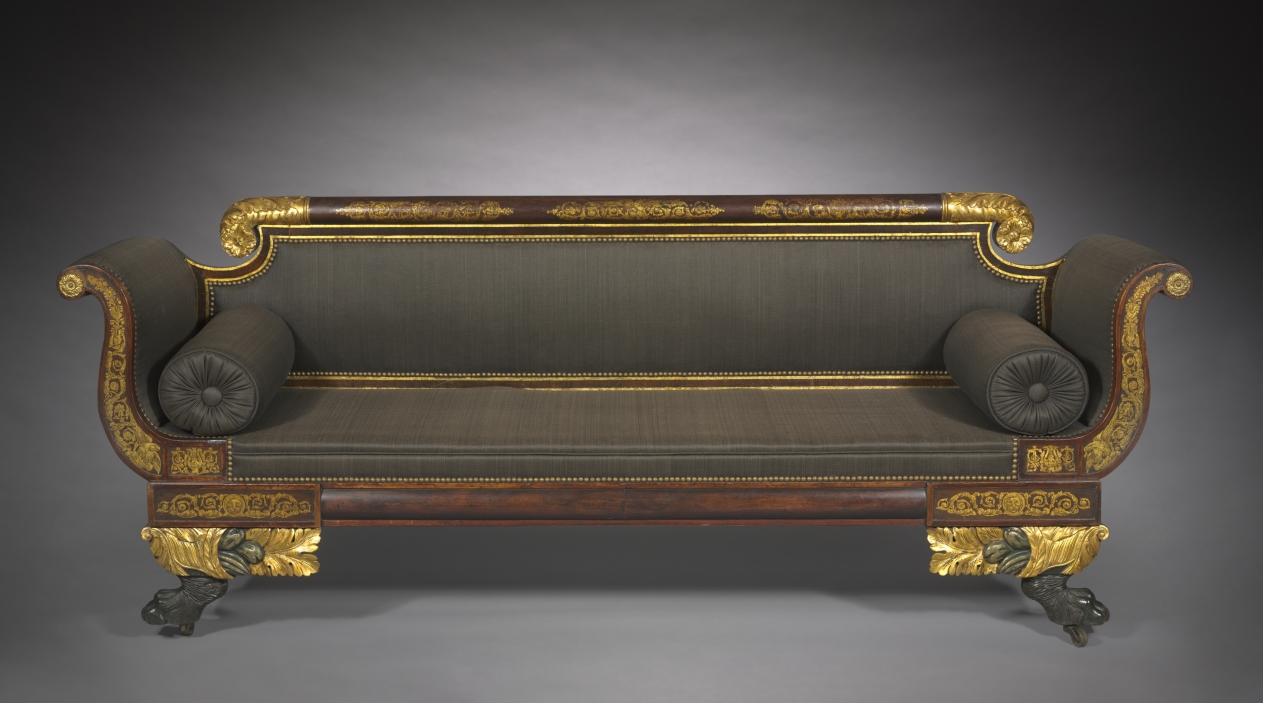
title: Sofa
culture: America, New York, Empire style, 19th century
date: c. 1820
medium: wood with painted and gilded decoration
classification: Furniture and woodwork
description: The classically inspired elements of design such as the scrolled arms and the well executed gilt decoration identifies this sofa as an example of American Empire style furniture almost certainly made in New York City.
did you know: At first glance you might not notice the animals, but look closely and you will discover the small faces of lions and the outstretched wings of eagles that decorate this sofa's frame. Furniture made in the Empire style was adapted from ancient Grecian forms by Parisian and American cabinet makers influenced by the classical style.